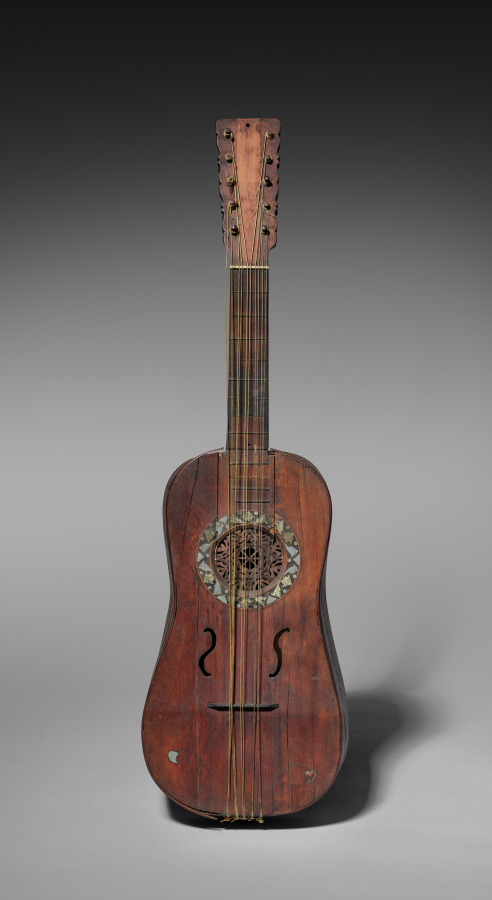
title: Chittara Battente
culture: Italy, 15th century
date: 1400s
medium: wood, paper?, sound hole, bone bridge, sheet metal inlay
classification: Musical Instrument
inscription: bears broken ticket of parchment.